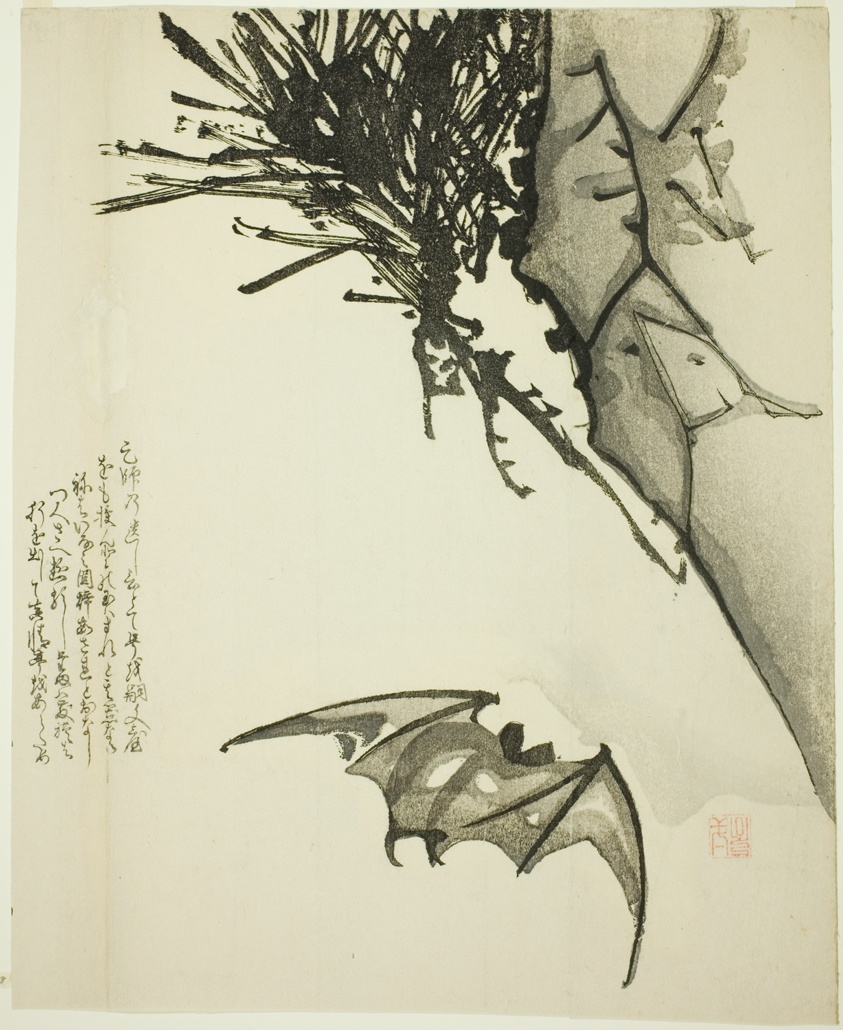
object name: Print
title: A Bat Flying near a Pine Tree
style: Japanese (culture or style)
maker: Isshō; Japanese, active 19th century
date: 19th century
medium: Woodblock print; surimono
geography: Japan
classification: print; asian art